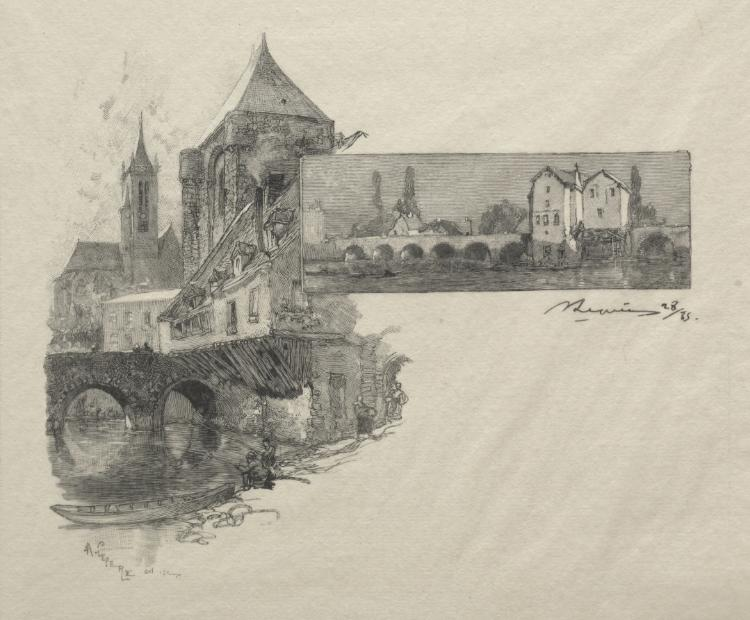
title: Moret - Le moulin à tan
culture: France, 19th-20th century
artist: Auguste Louis Lepère (French, 1849–1918)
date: 1889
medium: wood engraving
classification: Print